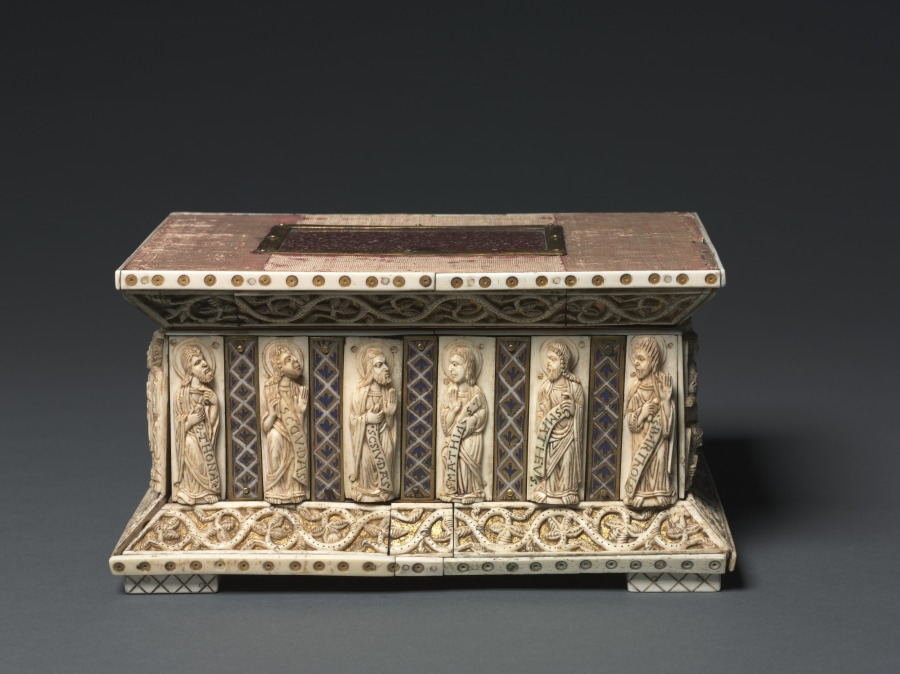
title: Portable Altar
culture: Germany, Cologne, Gothic Period, 13th century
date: c. 1200–1220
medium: walrus ivory, gilded copper, porphyry, champlevé enamel, wood core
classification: Ivory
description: The principal decoration of this portable altar is carved of walrus ivory. On the long sides are traditional figures of standing apostles. On the short sides are the seated Virgin with the Magi, and Christ the Judge between the symbols of the Evangelists. The commercial ties between the Rhineland and the Norse peninsula made walrus ivory easily available to the city of Cologne, one of the most important artistic centers in medieval Germany.